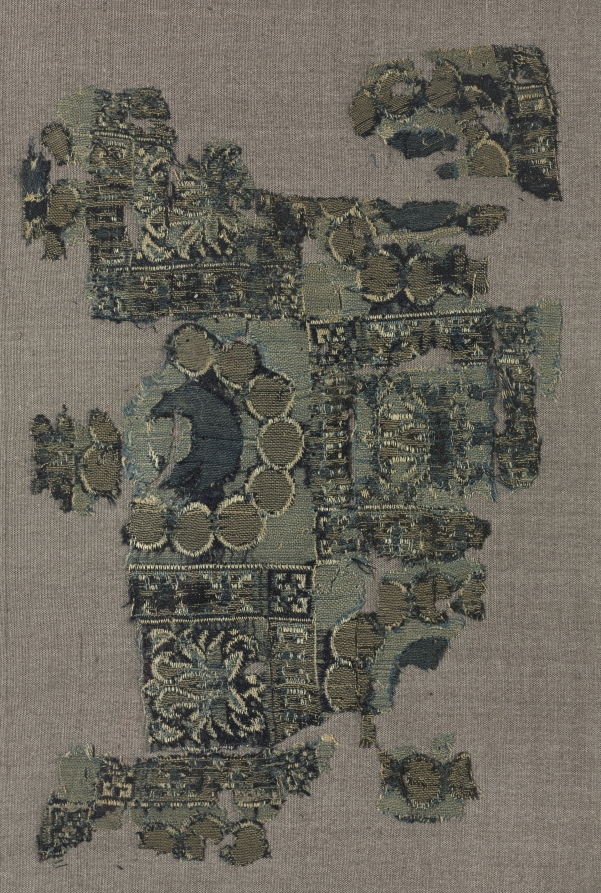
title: Fragment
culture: Egypt or Syria, Mamluk period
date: 1300s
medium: double cloth, tabby weave; silk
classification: Textile